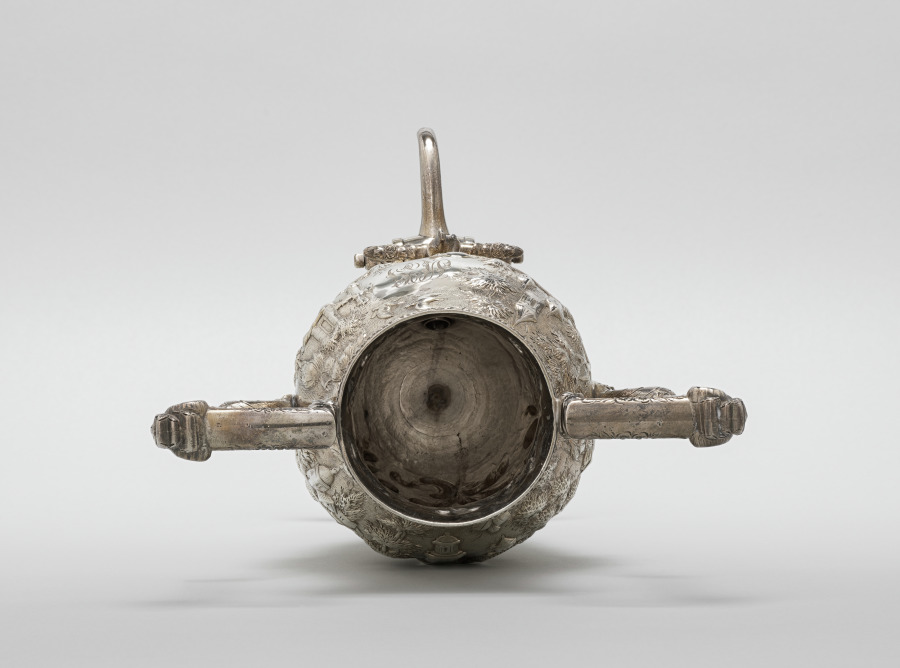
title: Coffee Urn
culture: America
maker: Samuel Kirk (American, 1793–1872)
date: c. 1843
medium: Silver, ivory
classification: Silver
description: Samuel Kirk was a leading American silversmith in the early 19th century whose Baltimore studio had became a major American silver company that thrived throughout the middle of the 20th century. Such a large, impressive coffee urn as this highly decorated example was considered the ultimate in Samuel Kirk silver and was largely made by hand.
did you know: The decoration on this coffee urn was achieved through a technique known as "repousse" in which the design was hammered into relief from behind.